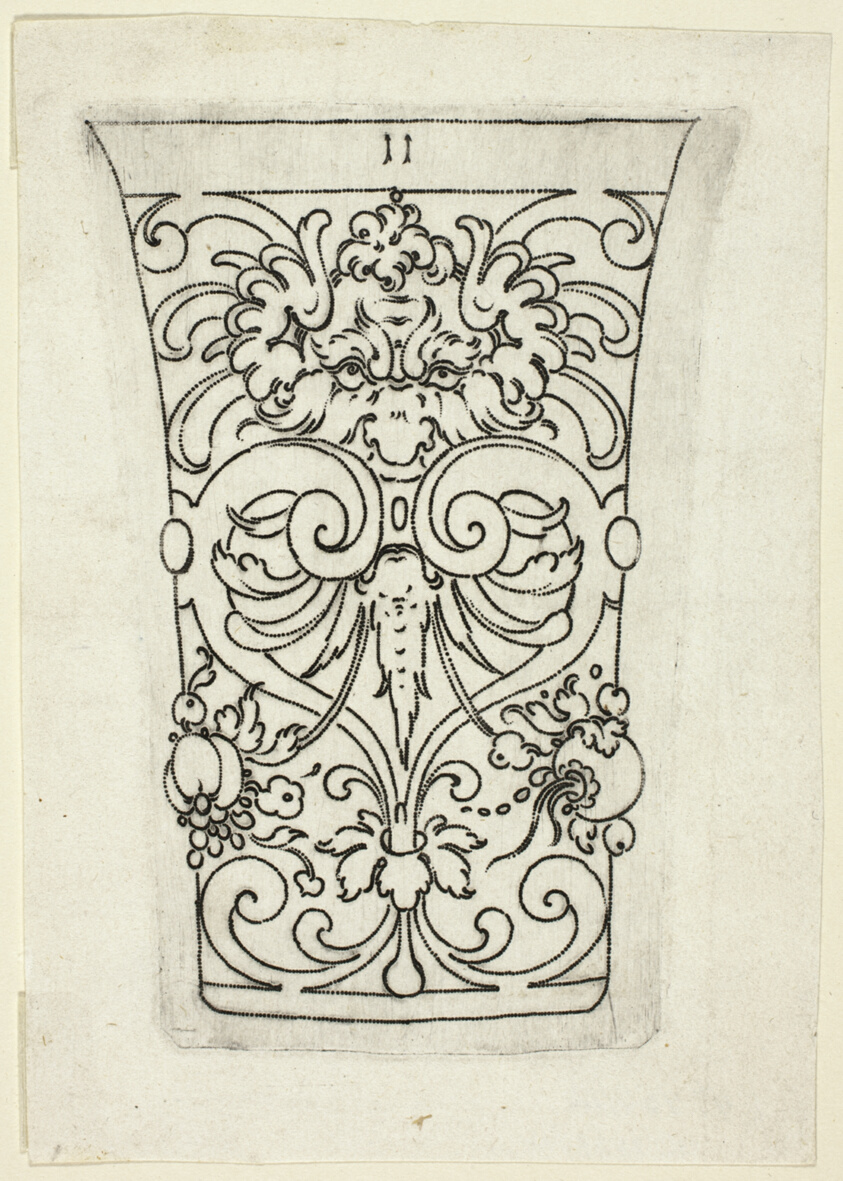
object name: Print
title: Plate 11, from XX Stuck zum (ornamental designs for goblets and beakers)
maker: Master A.P. (German, active early 17th century)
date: 1601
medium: Punch engraving in black on ivory laid paper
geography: Germany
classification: engraving; print; prints and drawing